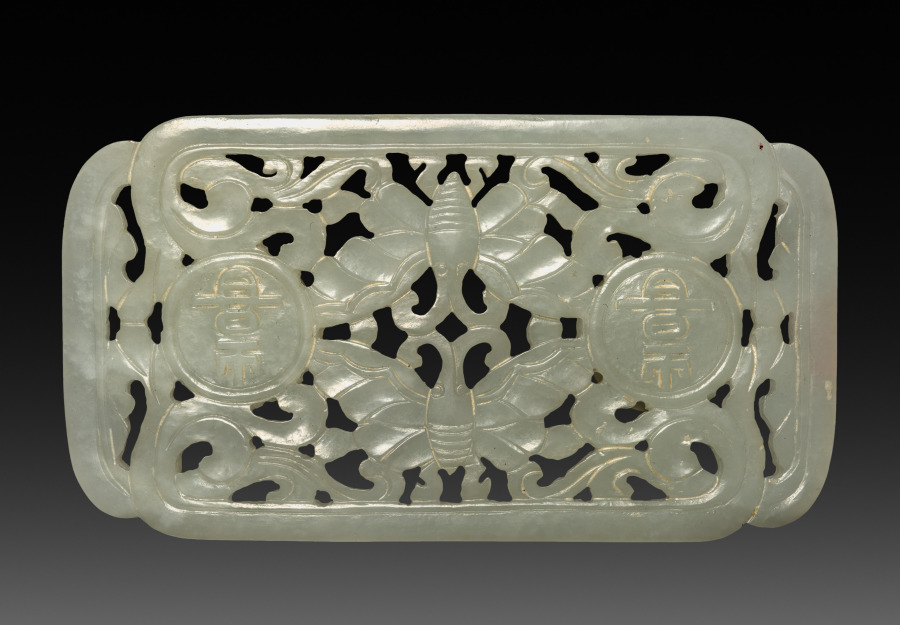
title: Buckle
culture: China, Qing dynasty (1644-1911) or Republican period (1912-49)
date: 1900s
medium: white jade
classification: Jewelry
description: The jade buckle is perforated to represent two butterflies, scroll patterns, and coins.